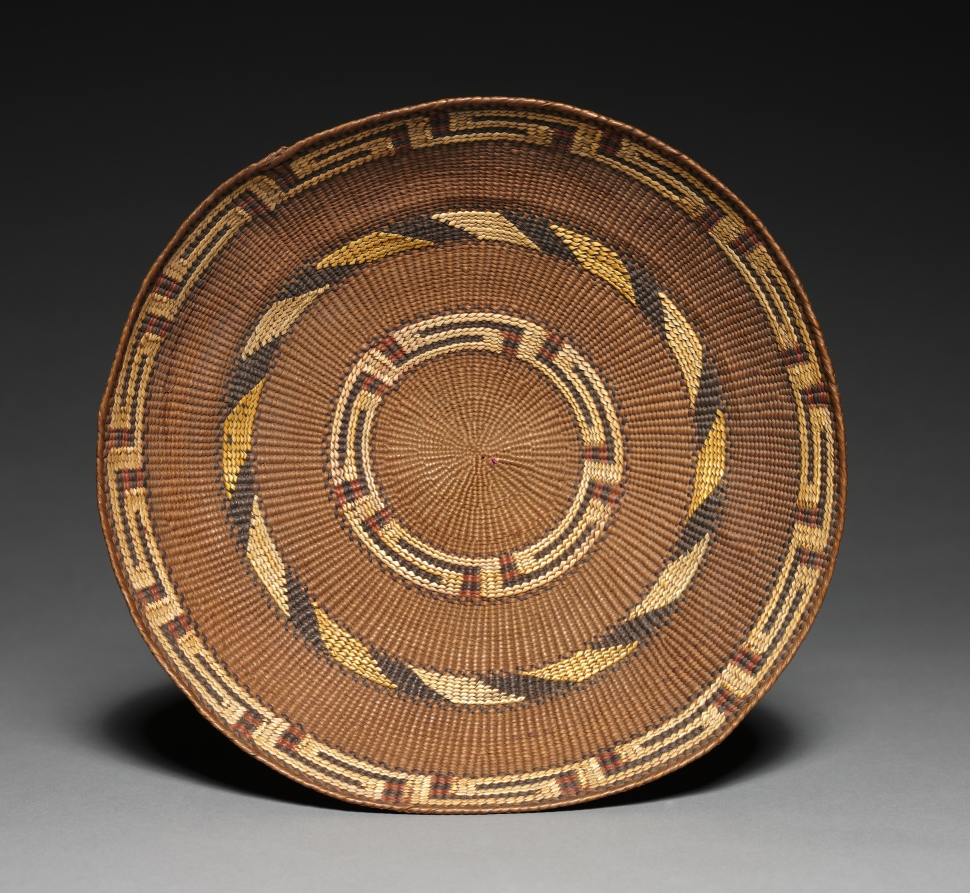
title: Twined Bark Tray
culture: Northwest Coast, Tlingit, late 19th century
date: late 1800's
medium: twined bark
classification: Basketry